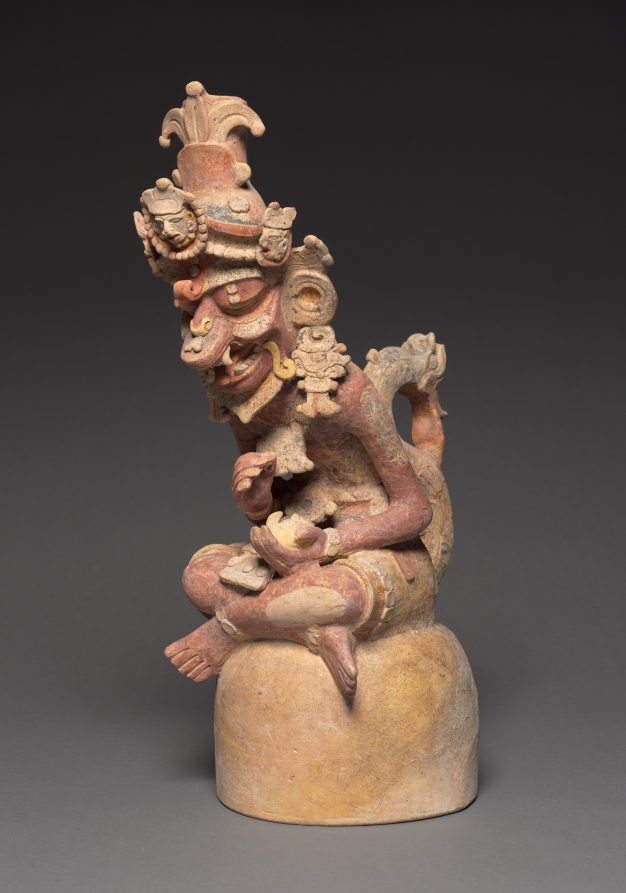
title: Artisan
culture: Guatemala, Petén region, Maya style (250-900), Maya style (250-900)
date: 250–600 CE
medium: earthenware with colored slips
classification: Sculpture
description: These figures represent the supernatural patrons of the visual arts and writing: the brothers Hun Batz and Hun Chuen ("One Monkey" and "One Artisan"). The two were refined artists but also bullies who tormented their younger brothers, who took revenge by transforming their elders into monkeys. Many Maya representations of the painter-scribes immortalize this fate by depicting the pair with both simian and human features, as here. The brothers are shown engaged in artistic or scribal pursuits. Sitting on high-domed bases that may have served as the lids of incense or offering bowls, each apparently once grasped a tool in his upper hand-for instance, a paint brush or a stylus for writing. In the lower hand, one cradles a small mask and the other, a piece of bark that likely refers to the beaten bark from which the Maya made books.